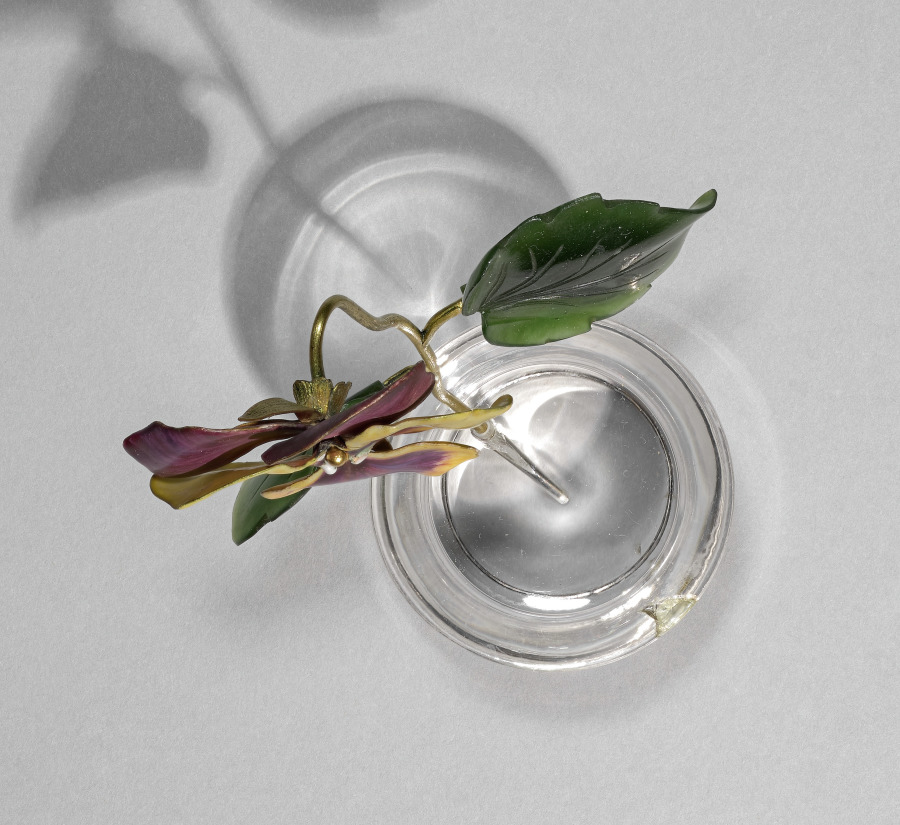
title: Flower Study of a Pansy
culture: Russia, St. Petersburg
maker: House of Fabergé (Russian, 1842–1918)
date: c. 1885–1915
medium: gold, jade, enamel, rock crystal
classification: Miscellaneous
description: This flower study depicts a pansy in bloom. Fabergé’s inspiration for his flower studies is said to have come from the floral brooches of precious stones that were made in the 1700s for Catherine the Great as well as from the Japanese art of flower arranging, known as ikebana. Small and delicate, Fabergé’s flower studies were given as intimate gifts to friends by the tsarina and others in the court. She also liked to take them around to wherever the imperial family was residing as a reminder of spring during the harsh Russian winters.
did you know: The stems of Fabergé’s flower studies are set into little basins carved from rock crystal to resemble pots of water.